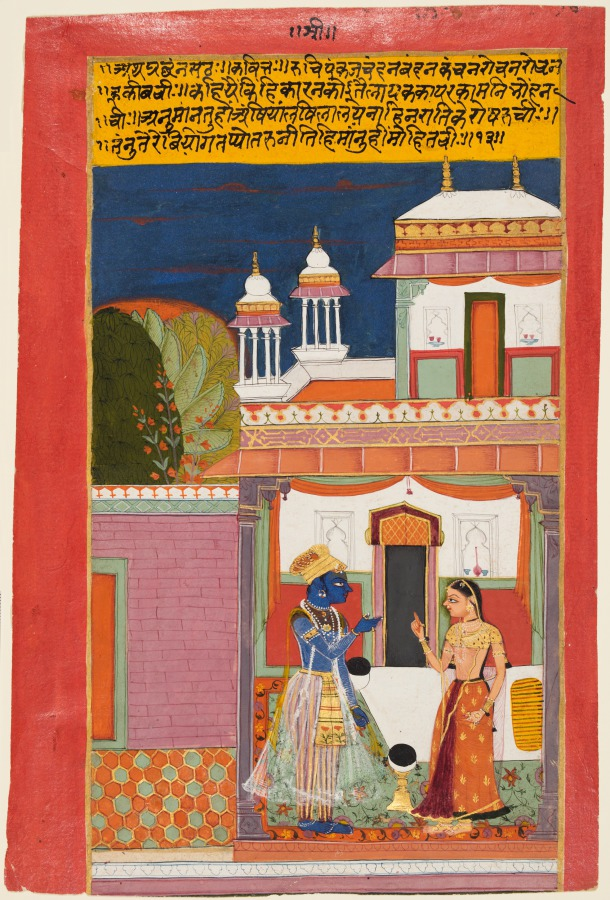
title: Krishna and Radha Quarreling: Shatha Nayaka, from a Rasikapriya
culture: Northwestern India, Rajasthan, Rajput Kingdom of Bundi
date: c. 1680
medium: Gum tempera and gold on paper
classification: Painting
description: When Krishna returns home at dawn, having spent the night elsewhere, an infuriated Radha inquires about his whereabouts and accuses him of infidelity. Krishna, realizing the intensity of the situation, tries to assuage her with sweet words and compares her red eyes to lotus petals. The rising sun behind the thick foliage is suggestive of early dawn.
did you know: Krishna wears a transparent white muslin jama, a popular article of Mughal fashion since the time of Emperor Jahangir (r. 1605–27).